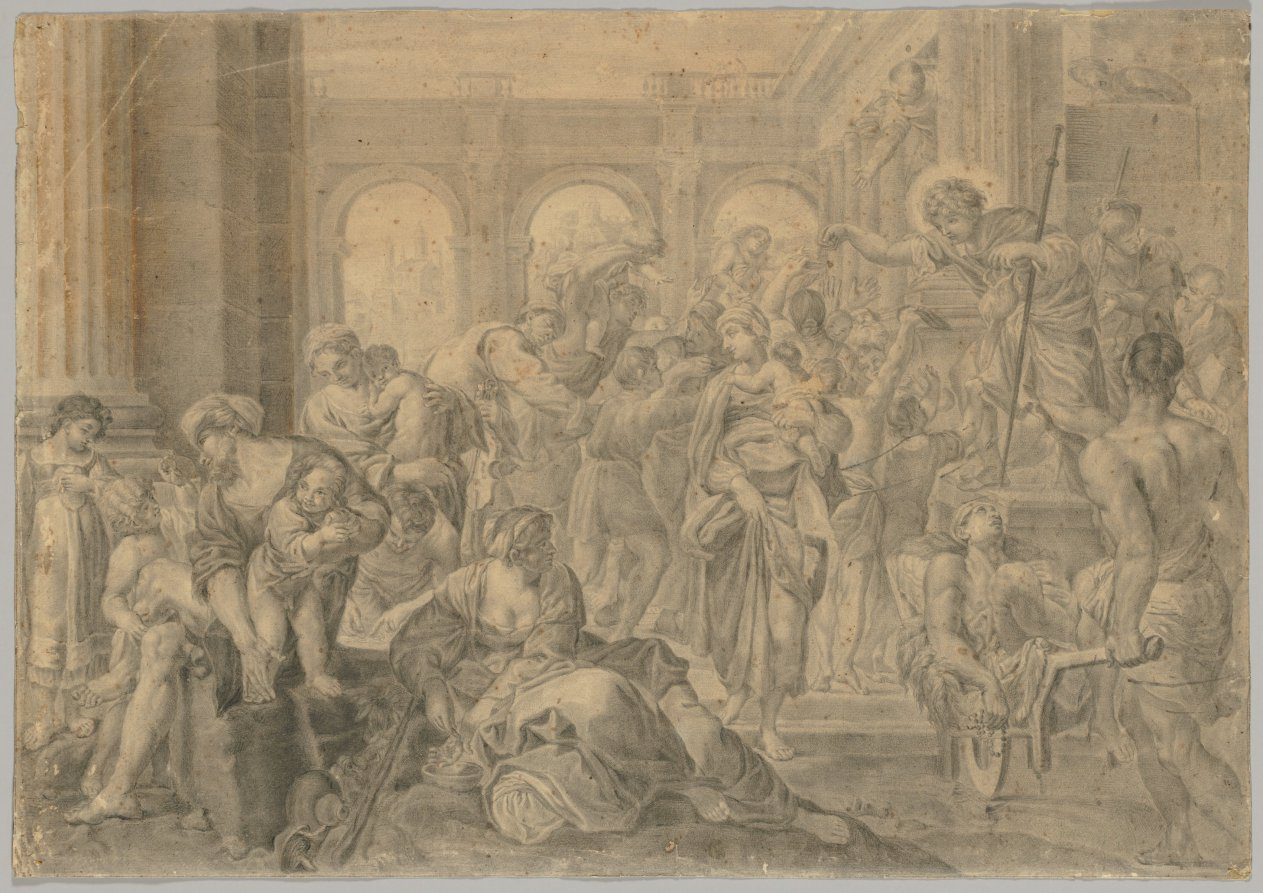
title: Copy of Annibale Carracci's St. Roch Giving Alms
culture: Italy, Bologna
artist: copy after Annibale Carracci (Italian, c. 1560–1609)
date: 1595 or after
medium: black chalk/charcoal(?) with stumping, with brush and brown and gray wash; framing lines in black chalk/charcoal(?)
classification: Drawing